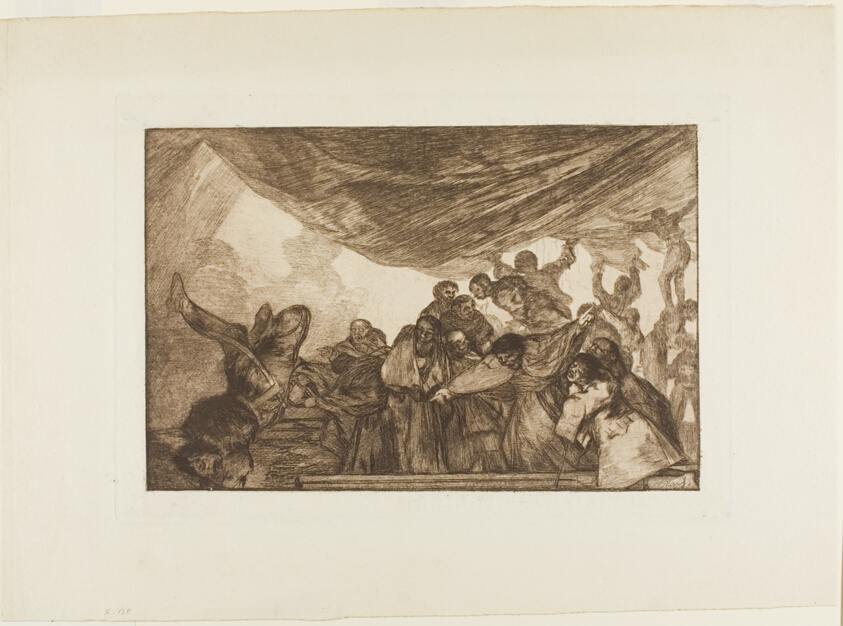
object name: Print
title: Without commending himself either to God or the devil, plate 15 from Los Proverbios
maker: Francisco José de Goya y Lucientes (Spanish, 1746-1828)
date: 1815/24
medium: Etching, burnished aquatint and lavis printed in sepia ink on ivory wove paper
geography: Spain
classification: etching; print; prints and drawing